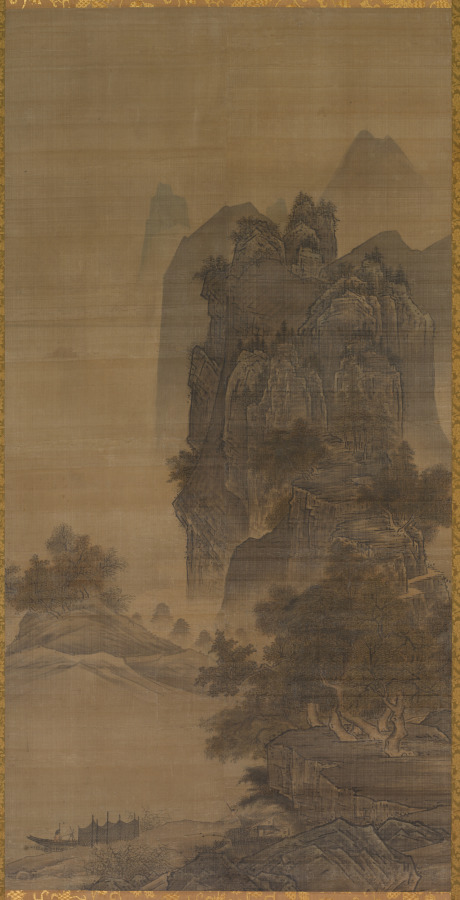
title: Sunset Glow over a Fishing Village, from Eight Views of Xiao-Xiang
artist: follower of Sesshū Tōyō (Japanese, 1420–1506)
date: 1460s–1550s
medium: Hanging scroll from a set of eight; ink and color on silk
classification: Painting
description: This painting and CMA 2015.589 belong to a group that was likely mounted as a pair of four-panel folding screens focusing on the Eight Views of Xiao-Xiang, a theme centered on an area in southern China. This one represents the motif “Sunset Glow Over a Fishing Village.” Both emulate the style of Chinese painter Li Tang (about 1050–after 1130). Some scholars believe the paintings are the work of Sesshū Tōyō (1420–1506), the only Japanese painter of his day to have traveled to China.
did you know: This painting incited robust scholarly debate in both Japan and the United States about its date.